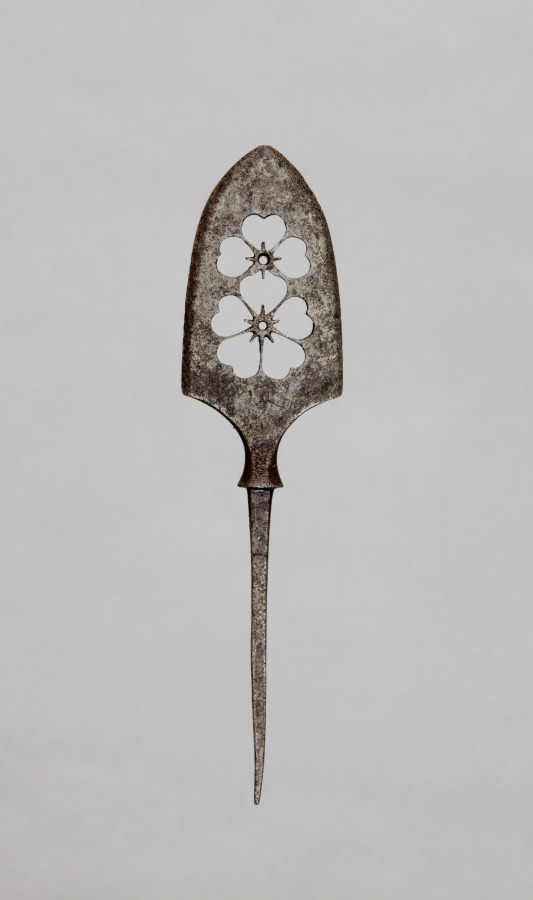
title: Arrow Point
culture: Japan, Edo period (1615–1868)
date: 1700s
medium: steel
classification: Arms and Armor